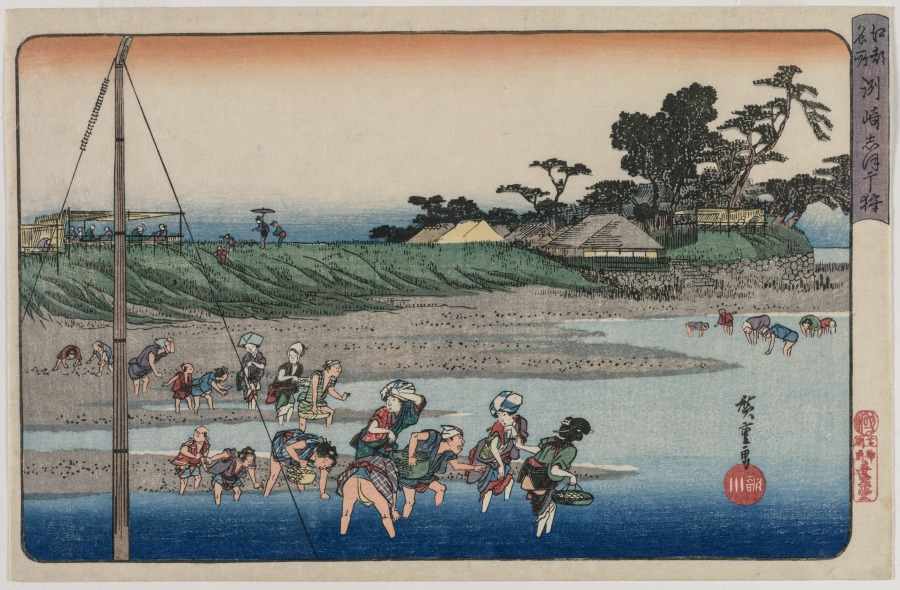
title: Gathering Shellfish at Low Tide at Susaki, from Famous Places in Edo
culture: Japan, Edo period (1615–1868)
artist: Utagawa Hiroshige (Japanese, 1797–1858)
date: mid-1830s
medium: color woodblock print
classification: Print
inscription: Signature: Hiroshige ga. Artist Seal: Utagawa.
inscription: Publisher: Sanoya Kihei (Kikakudō, Shiba shinmei mae). Censorship Seal: kiwame.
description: Susaki, a strip of land along Edo (now Tokyo) Bay, was known for excellent shellfish harvests during low tide in the spring. Utagawa Hiroshige designed this print so that the viewer seems to be floating in the bay on board a ship, whose mast and rigging span the left foreground. Instead of depicting the lives of wealthy elites, this landscape focuses on the working-class people wading into shallow water to fill their baskets with shellfish. Susaki Shrine is shown amid pine trees on the right, while the leisure class enjoying the sea breezes from a pavilion are reduced to small figures in the background.